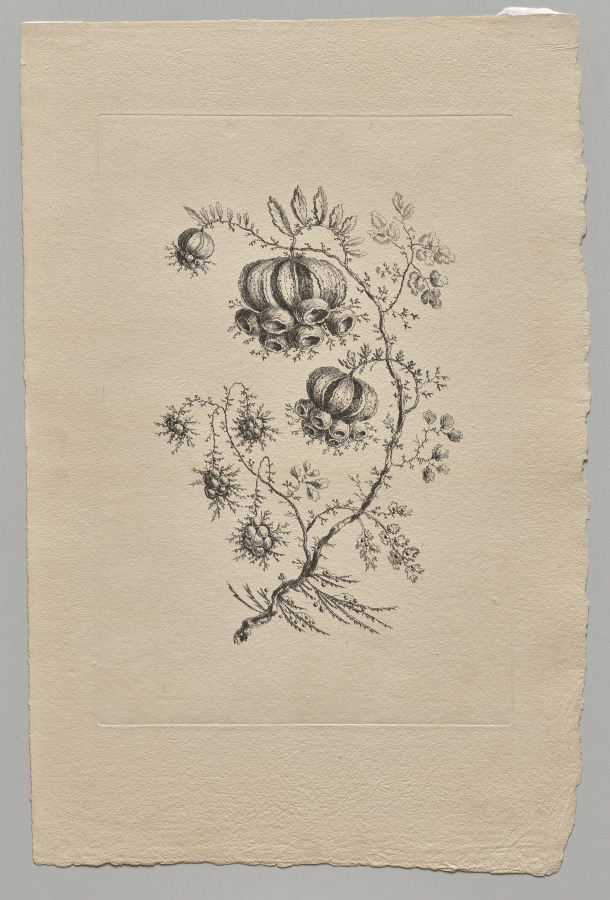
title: Persian Flowers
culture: France, 18th century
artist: Jean Baptiste Pillement (French, 1728–1808)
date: 1755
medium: etching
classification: Print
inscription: Watermark, undetermined words/letters along left edge.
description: Jean Baptiste Pillement was one of the most influential designers of the Rococo period, known for his varied and prolific chinoiseries (European variants of Chinese and Japanese motifs). His designs were spread throughout Europe primarily via their translation into prints. This print is one of a set of six etched by Pillement himself. Each depicts a so-called “Persian” flower, largely fantasies, presenting strange, alienlike floral forms that could be adapted to various uses from textiles to wall decorations.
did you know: The artist Jean Baptiste Pillement was employed by Marie Antoinette to create decorations for her legendary retreat, the Petit Trianon, at Versailles.